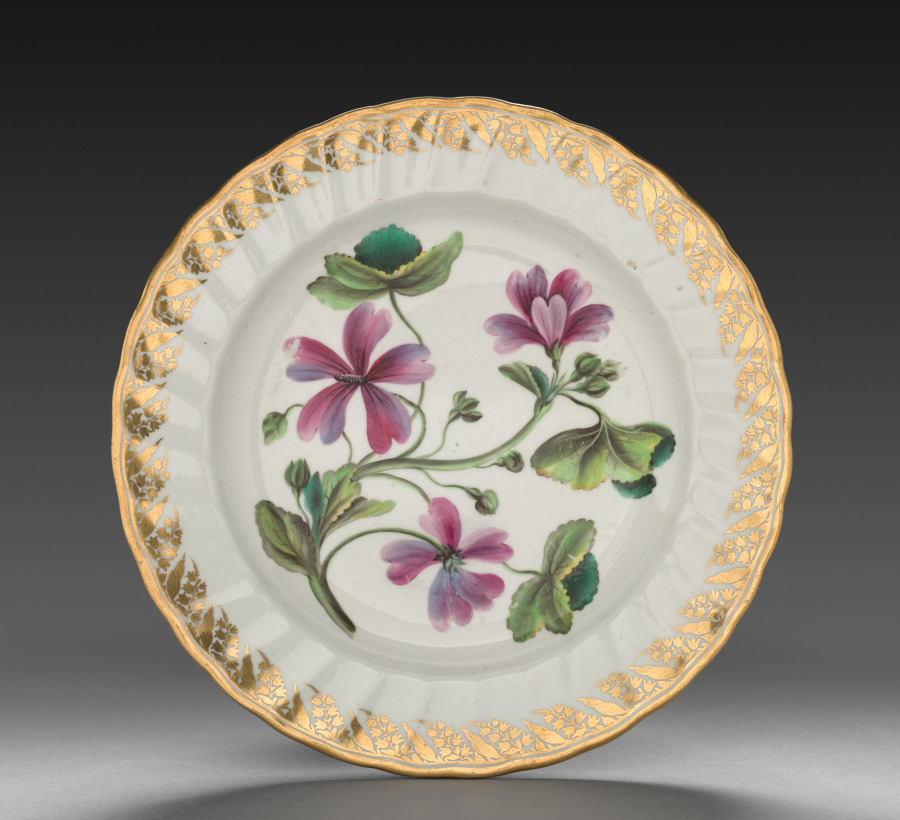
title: Plate from Dessert Service: Althaea Marsh Mallow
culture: England, Derby, 18th century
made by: Derby (Crown Derby Period) (British)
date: c. 1800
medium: porcelain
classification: Ceramic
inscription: inscribed in blue on back: Althaea Marsh Mallow./crown/crossed batons and dots/D/115.